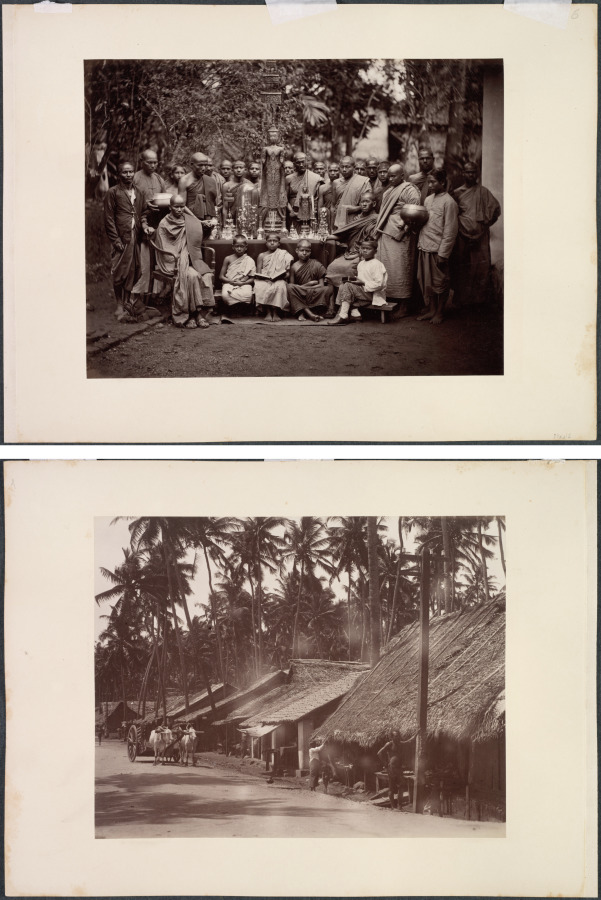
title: Untitled (recto); Untitled (verso)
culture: England, 19th century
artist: Skeen & Co. (British, active 1860–1920)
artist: Charles T. Scowen (British)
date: 1880s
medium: Albumen print, gold-toned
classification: Photograph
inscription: Written in pencil on mount with the image of the posed people: "6" Written in pencil on mount with image of oxen: "7" Written in pencil on verso of mat: "W.L.H. Skeen (1860-1900)/CEYLON, 1880s/gold-toned albumen print/1700 (Euros) 135 x 260 mm"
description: Probably taken by one of two British photographic firms based in Ceylon (present-day Sri Lanka), this image was likely shot by a European and was definitely made for a European audience, not for the individuals depicted. It is unlikely the sitters ever saw the finished photograph. Such ethnographic portraits were collected by governments as information, by tourists as souvenirs, and by “armchair travelers” as aids to the imagination. Viewers of the era would have regarded it more as a depiction of a cultural type than as a record of individual lives. Because interiors of temples were too dark to yield an image, the photographer arranged these Thai monks and worshippers along with some of their religious objects outdoors.